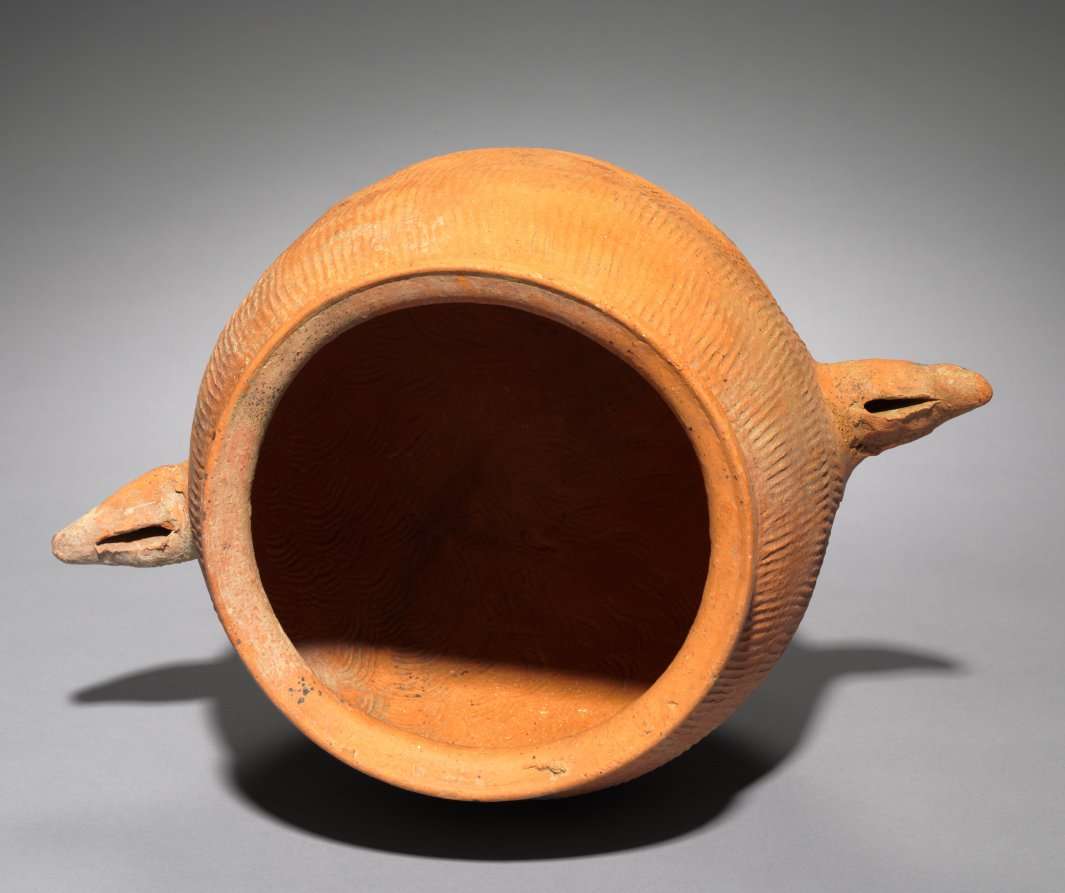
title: Jar with Horn-Shaped Handles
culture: Korea, Three Kingdoms period (57 BCE–668 CE)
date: 100s CE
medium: earthenware with impressed surface designs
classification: Ceramic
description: Although the function of this earthenware vessel remains unknown, its low-fired red surface indicates the various steps in its fabrication. First, coils of clay were layered on top of one another and pinched together to form the wall of the pot. Then wood mallets with carved surfaces pounded these walls simultaneously, inside and out, merging and thinning the clay bands. Thus the impressed designs visible on both the inner and outer surfaces were functional as well as decorative. A single incised line courses across the body wall of impressed patterns, linking the two "horns." Each of these is pierced to allow a uniform firing of the entire vessel. The function of the "horn" handles remains unknown. The smooth, finished surfaces of the short neck and thick, rounded mouth of the vessel indicate the use of a potter's wheel to complete the form. This rare vessel probably comes from the southwestern region of the Korean peninsula.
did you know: Closed kilns built on hillsides became widely used for producing this type of pottery vessel in Korea during the Three Kingdoms period.